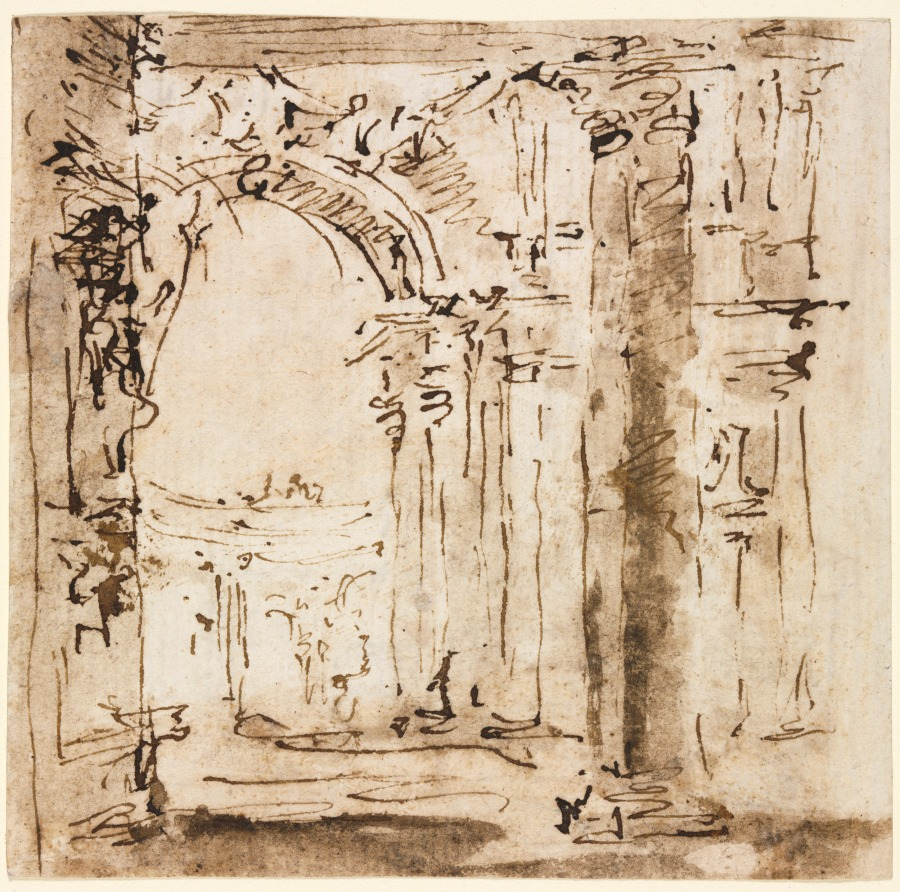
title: Pair of Drawings: Sketch of the Labyrinth of the Villa Pisani and Piazza San Marco with Doges' Palace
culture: Italy, 18th century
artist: Francesco Guardi (Italian, 1712–1793)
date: 1773–1778(?)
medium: pen and brown ink with brush and brown wash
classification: Drawing